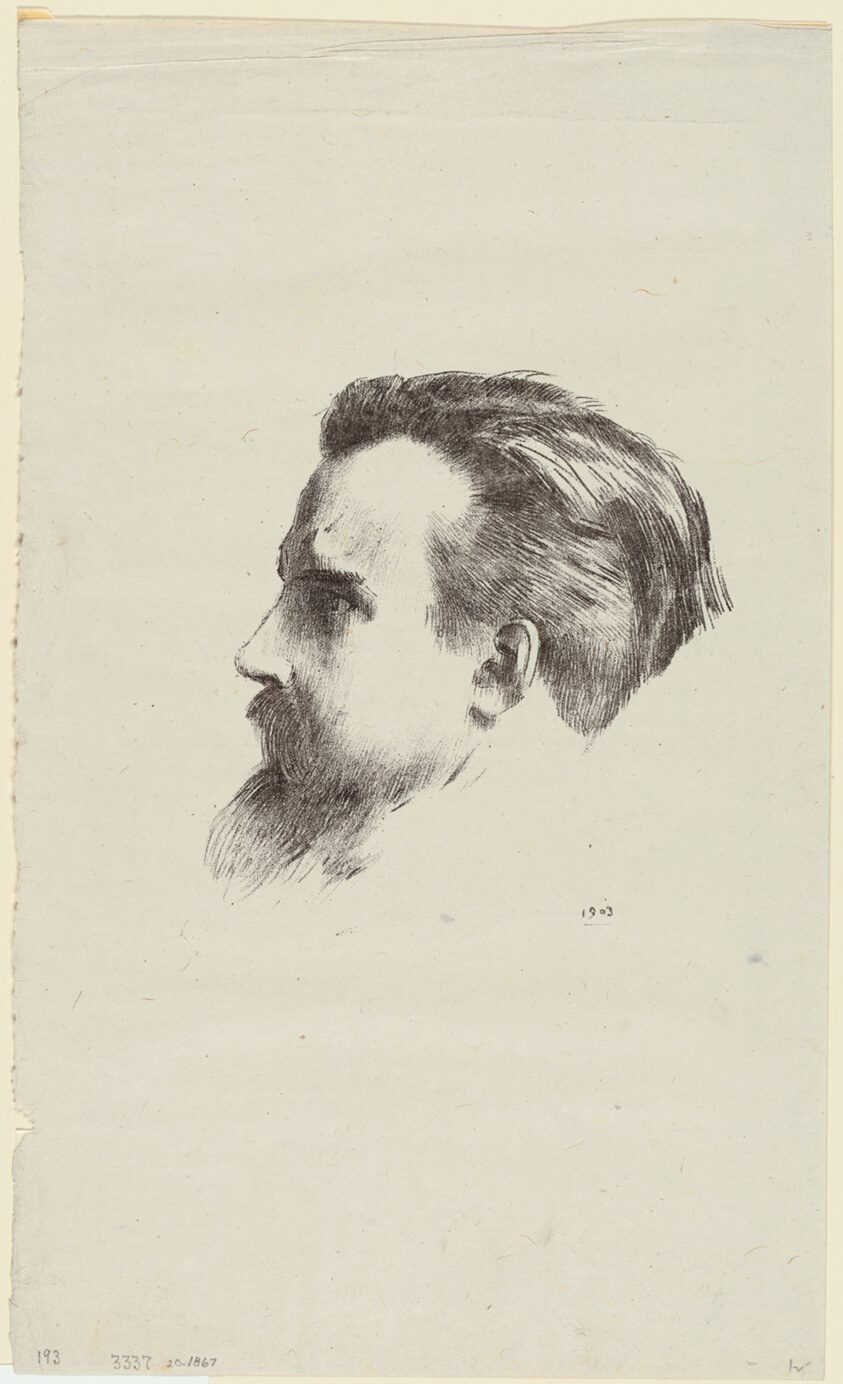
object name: Print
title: Maurice Denis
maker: Odilon Redon (French, 1840-1916)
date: 1903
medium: Lithograph in black on light gray chine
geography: France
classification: lithograph; print; prints and drawing; paper